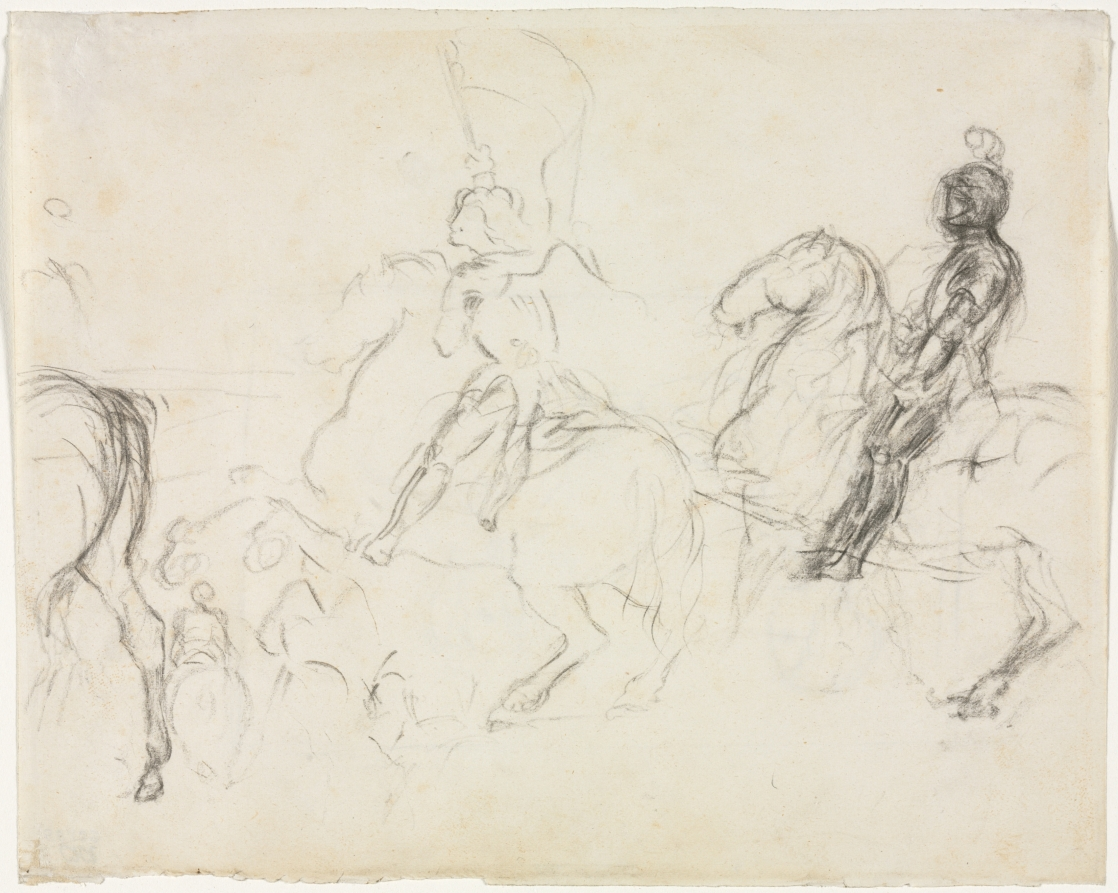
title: Battle Scene with Armored Figures on Horseback (recto)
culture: France, 19th century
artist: Edgar Degas (French, 1834–1917)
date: 1856–60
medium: black crayon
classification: Drawing